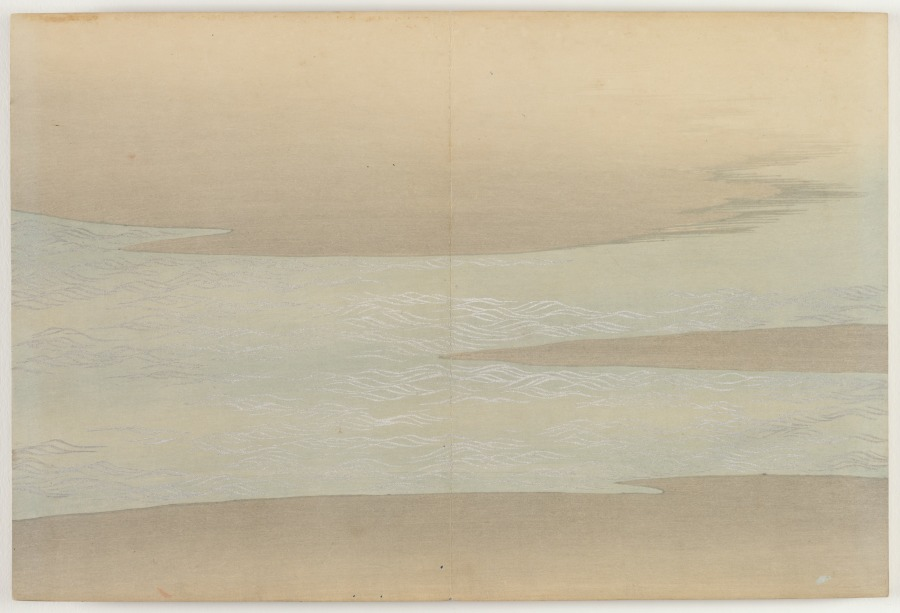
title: Flowers of a Hundred Worlds (Momoyogusa): Small Waves (Komani)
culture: Japan, Meiji period (1868–1912)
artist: Kamisaka Sekka (Japanese, 1866–1942)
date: 1909–10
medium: color woodcuts with gold and silver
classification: Bound Volume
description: This print from a set of three woodblock printed albums displays the graphic design prowess of Kamisaka Sekka. The images were first distributed one by one to subscribers to the series but later were reissued in bound form, like this book, for mass consumers. Each print features a vignette taken from nature or Japanese literature. Many of the scenes have a long history in Japan, originating in the 900s or 1000s and having been interpreted by all manner of artists since that time. Sekka’s selections hew closely to precedents from the Rinpa style originated by painter Tawaraya Sōtatsu (c. 1570–c. 1640) and calligrapher Hon’ami Kōetsu (1558–1637).